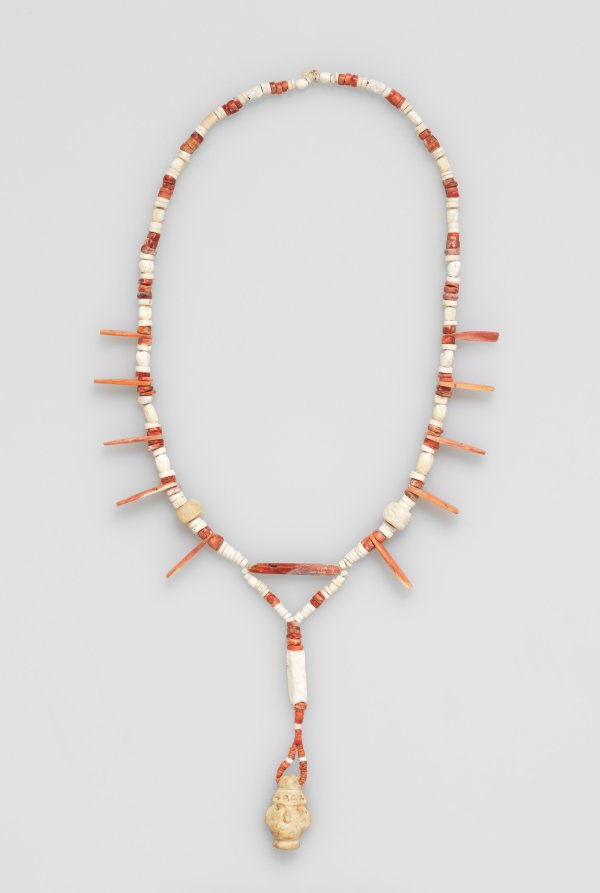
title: Necklace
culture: Peru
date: before 1532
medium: bone and beads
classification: Jewelry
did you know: These ancient beads were restrung in modern times.